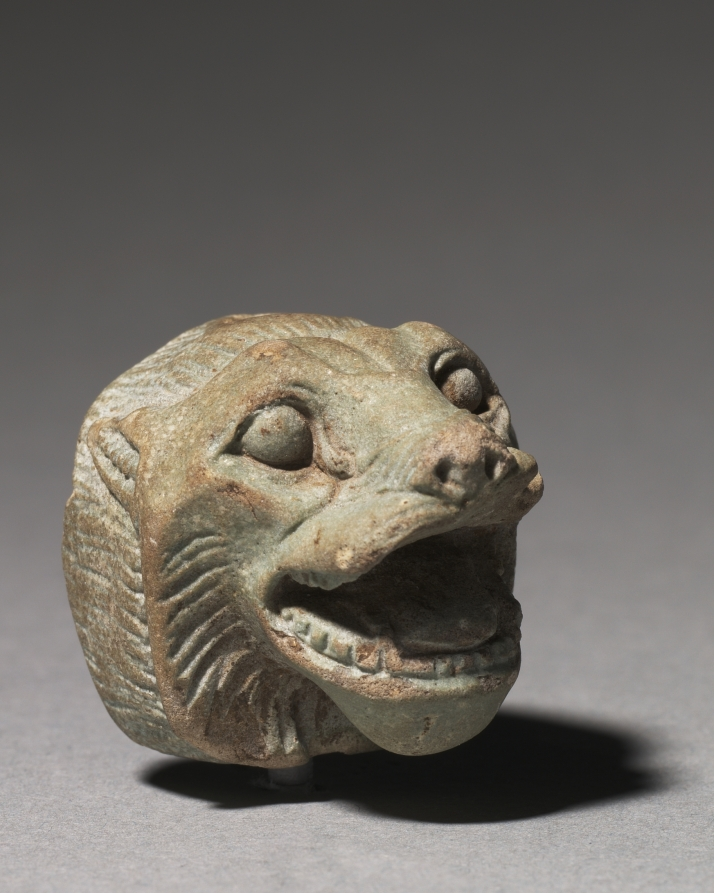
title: Lion Head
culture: Egypt, Late period (715–332 BCE), Dynasty 26 or later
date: 664–332 BCE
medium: glassy faience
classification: Sculpture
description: Roaring lions are rare in Egyptian art. They are, however, a common fixture in Persian art, from which the lion head in this case undoubtedly takes its stylistic cue.